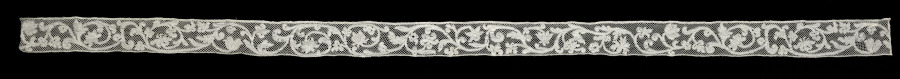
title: Lace Edging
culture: Italy, Milan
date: 1700s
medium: Linen: bobbin lace design on mesh ground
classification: Lace